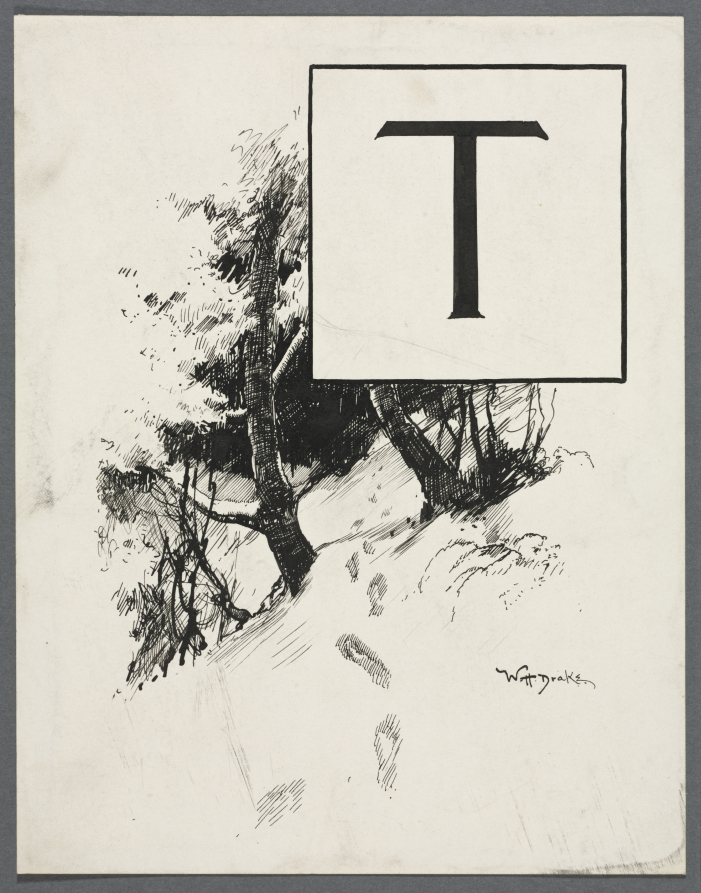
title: Inital T for Chapter XLIV from "Lorna Doone"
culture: America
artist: William Henry Drake (American, 1856–1926)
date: c. 1889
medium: pen and ink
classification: Drawing